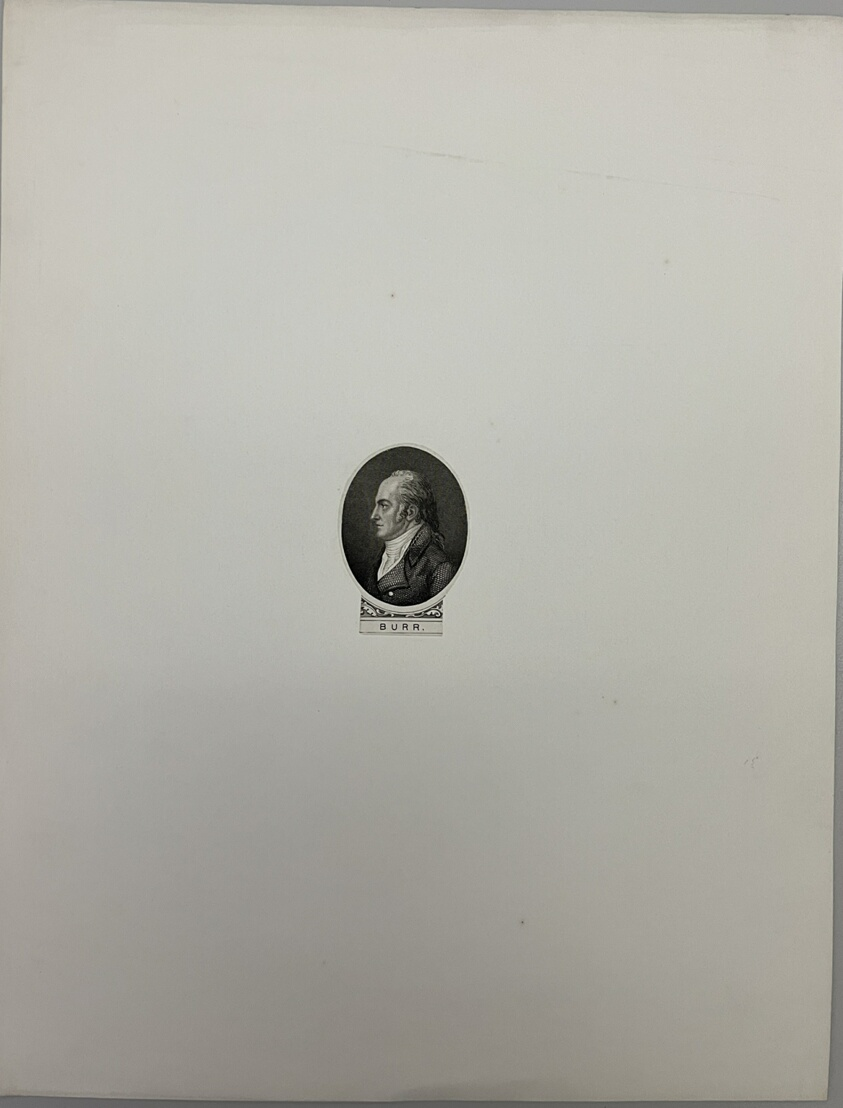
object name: Print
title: Burr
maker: Artist Unknown (Likely American or British, 19th century)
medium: Etching on paper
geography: United States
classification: reproduction; print; prints and drawing